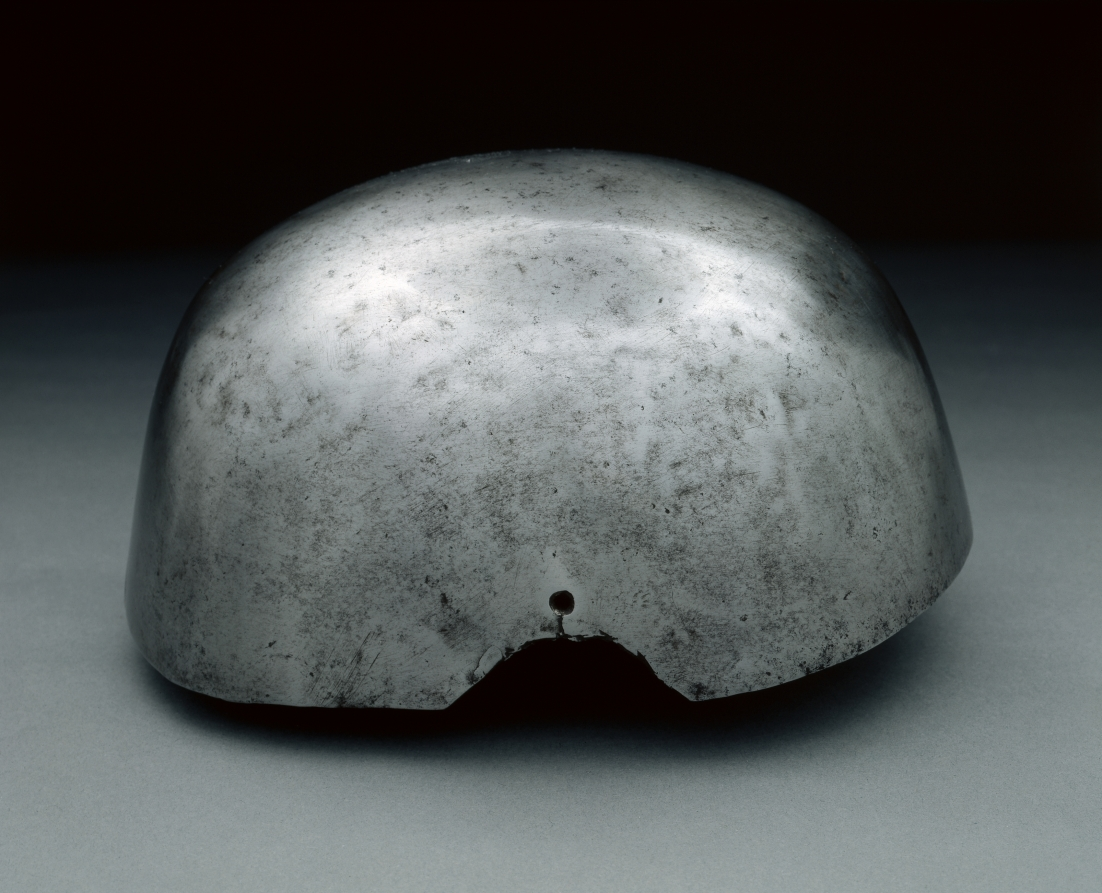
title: "Secrete" or Skull Cap (Hat Lining)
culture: England (?), 17th century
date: c. 1630–50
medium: steel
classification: Arms and Armor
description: Metal skullcaps, for wear under a hat, allowed the owner invisible protection against edged weapons. They were worn by both soldiers and civilians.